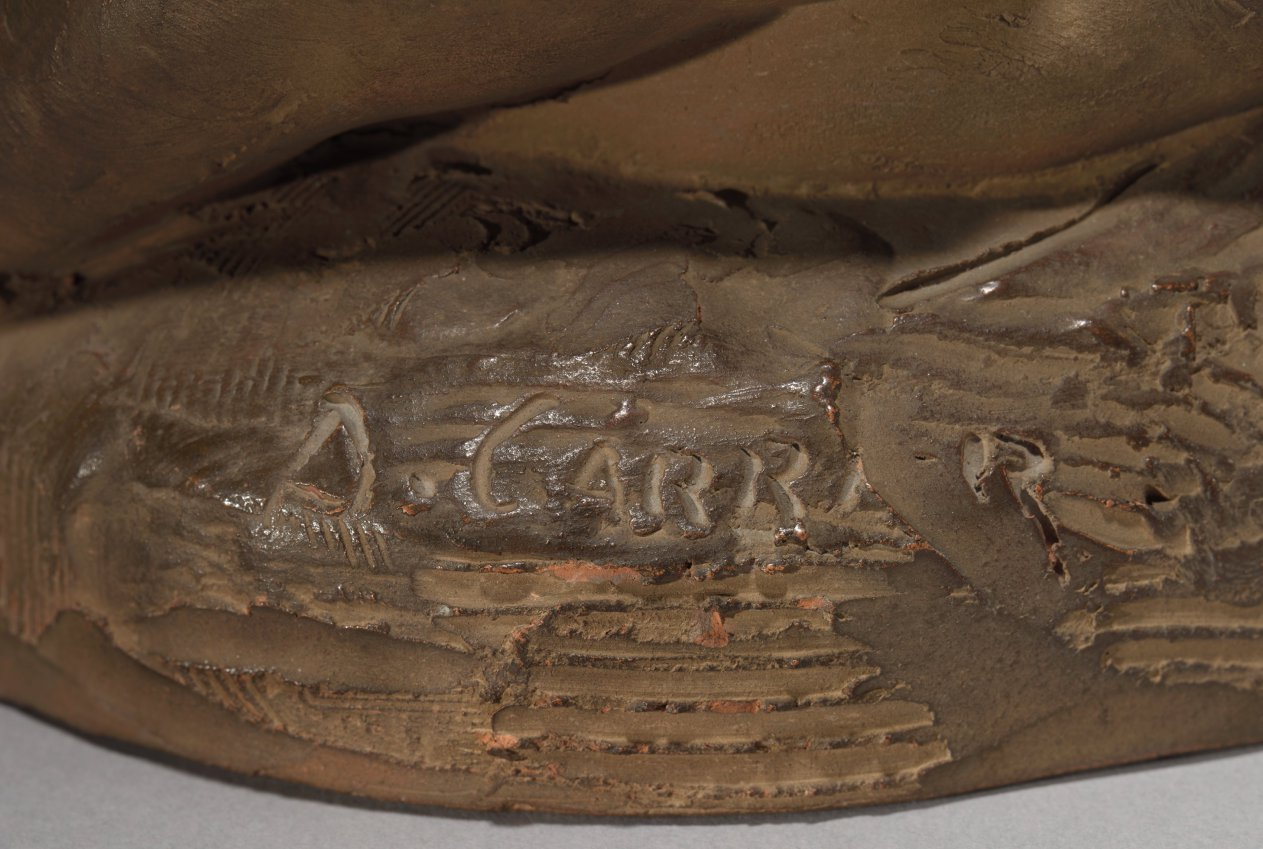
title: Putti Representing Earth and Water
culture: France, 19th century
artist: Albert-Ernest Carrier-Belleuse (French, 1824–1887)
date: 1865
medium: terracotta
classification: Sculpture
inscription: Signed near right corner: "A. Carrier (letter 'E' smeared)"; inscribed in pencil on upper surface of wooden base: "#2268" and "Henschel"; inscribed in pencil on bottom of wood base: "2268" and "Made-in-France"